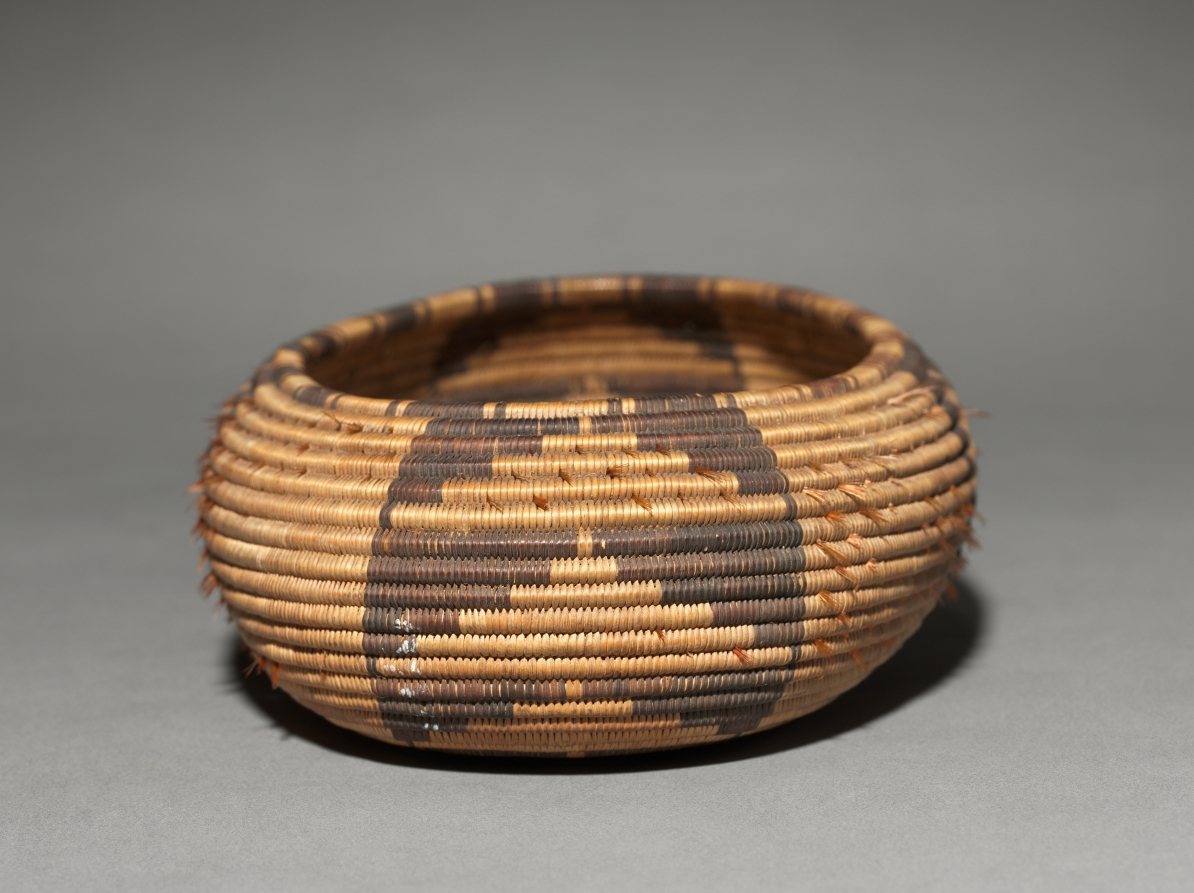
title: Gift Bowl, Canoe- Shaped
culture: California, Pomo, late 19th- early 20th century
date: 1890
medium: Willow, Bulrush, Sedge, with feather and acorn woodpecker; coiled (3 rods)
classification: Basketry